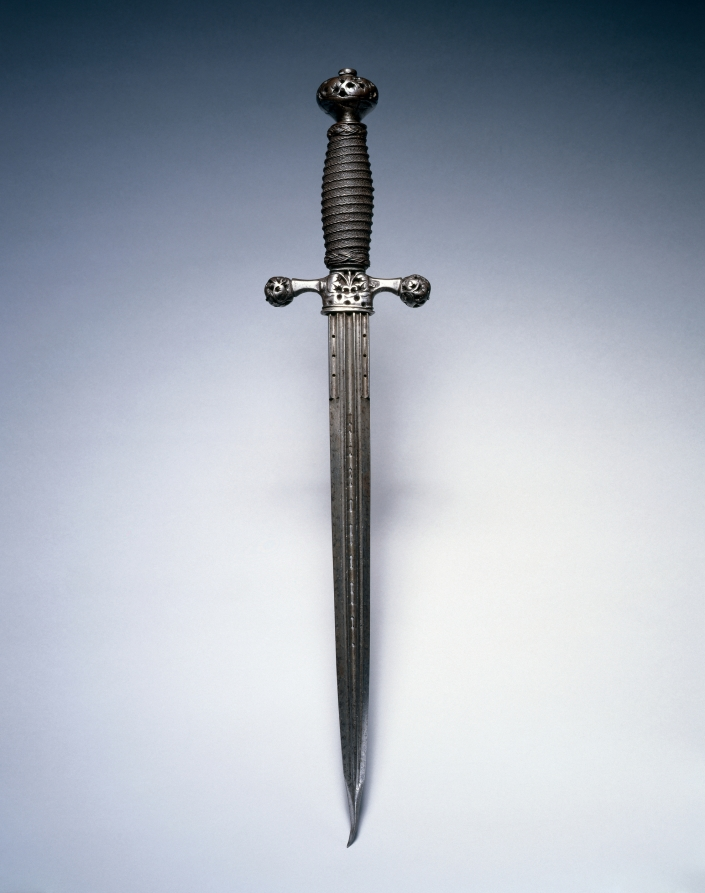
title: Dagger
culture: Netherlands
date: c. 1620–50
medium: steel, wire grip, perforated blade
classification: Arms and Armor